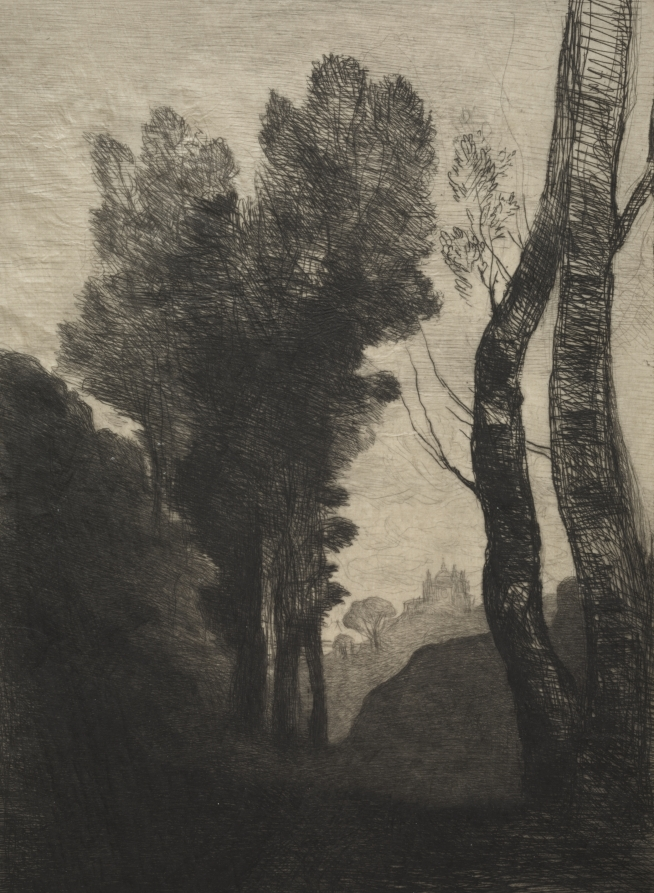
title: Environs of Rome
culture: France, 19th century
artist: Jean Baptiste Camille Corot (French, 1796–1875)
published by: Cadart and Luquet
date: 1866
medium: etching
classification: Print